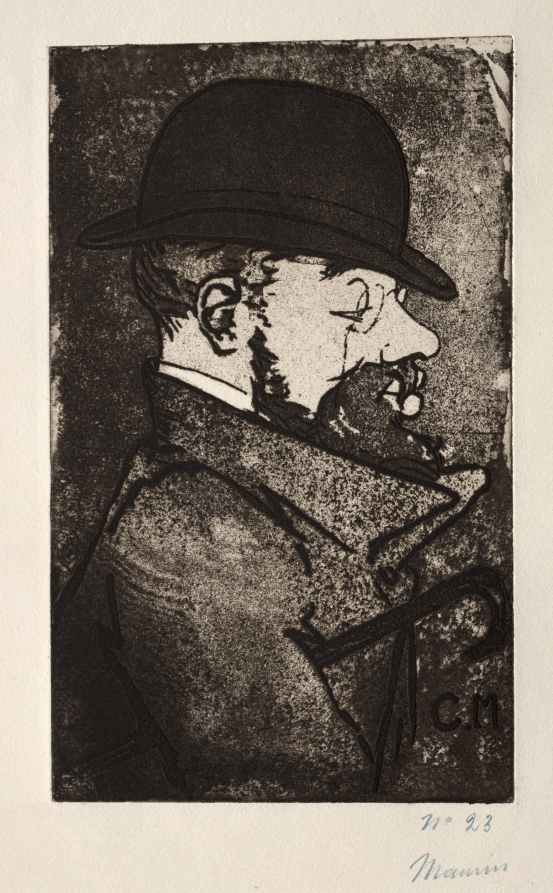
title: Henri de Toulouse-Lautrec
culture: France, 19th century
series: L'Estampe Originale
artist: Charles Maurin (French, 1856–1914)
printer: August Delâtre (French, 1822–1907)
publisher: Andre Marty (French, b. 1857)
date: 1893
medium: etching and aquatint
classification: Print